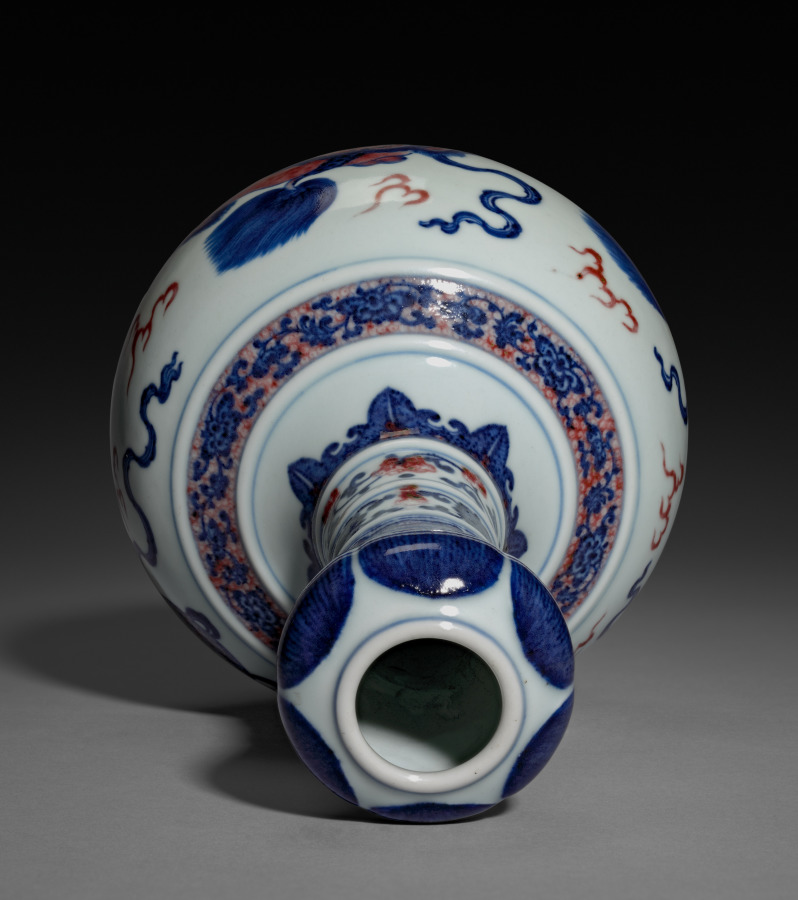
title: Bottle-shaped Vase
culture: China, Qing dynasty (1644–1911), Qianlong reign (1736–95)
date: 1736–95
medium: porcelain with underglaze decoration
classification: Ceramic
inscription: 大清乾隆年制